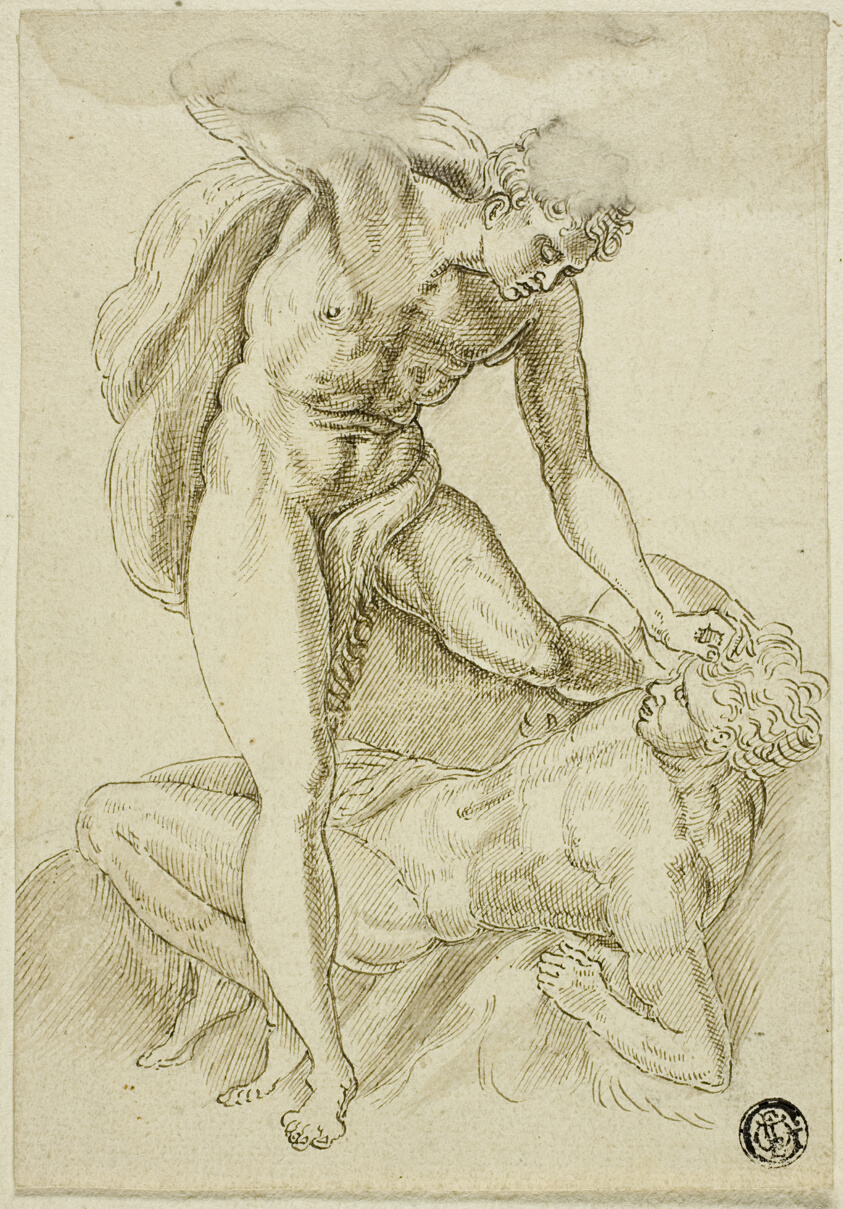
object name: Drawing and Watercolor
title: Cain Killing Abel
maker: Frans Floris, I (Flemish, 1516-1570)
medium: Pen and brown ink, over traces of graphite, on buff laid paper, laid down on ivory laid paper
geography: Flanders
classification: pen and ink drawings; drawings (visual works); prints and drawing